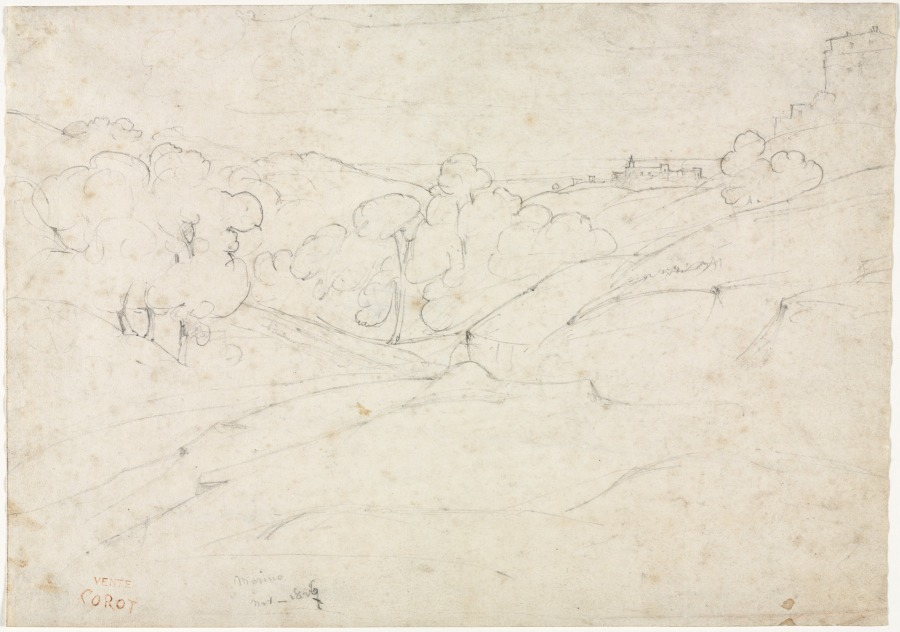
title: View of Marino (recto); Sketch for a Landscape (verso)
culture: France, 19th century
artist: Jean Baptiste Camille Corot (French, 1796–1875)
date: 1827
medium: graphite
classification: Drawing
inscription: [by artist?], lower left, in graphite: Marino / Nov - 1827 [in a later hand?: 6 written over the 7]